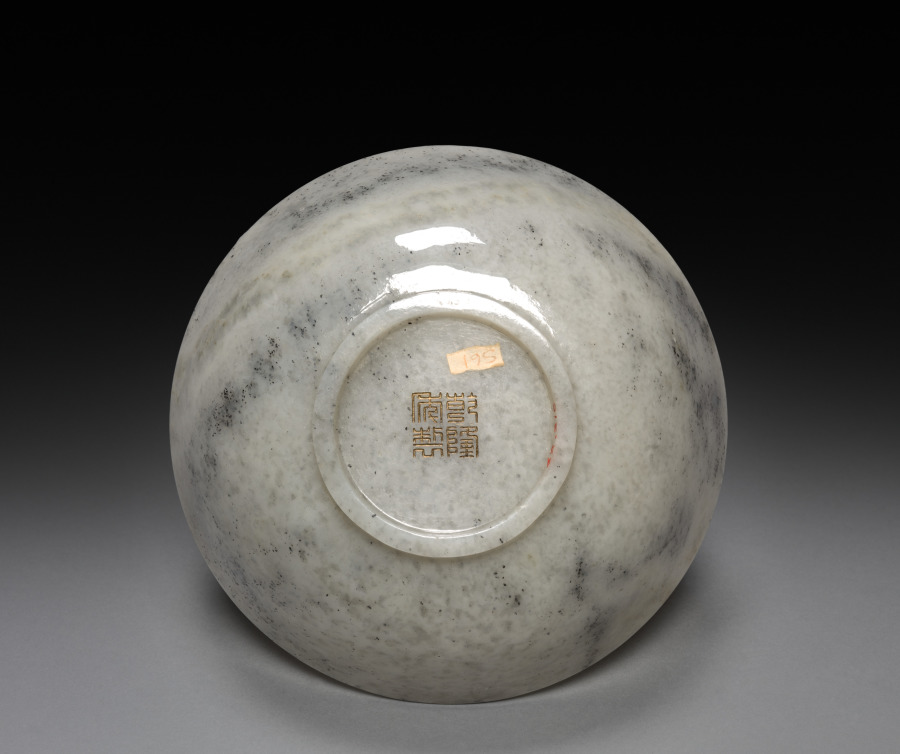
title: Bowl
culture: China, Qing dynasty (1644-1911), Qianlong mark and reign (1736-95)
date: 1736–95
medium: jade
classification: Jade